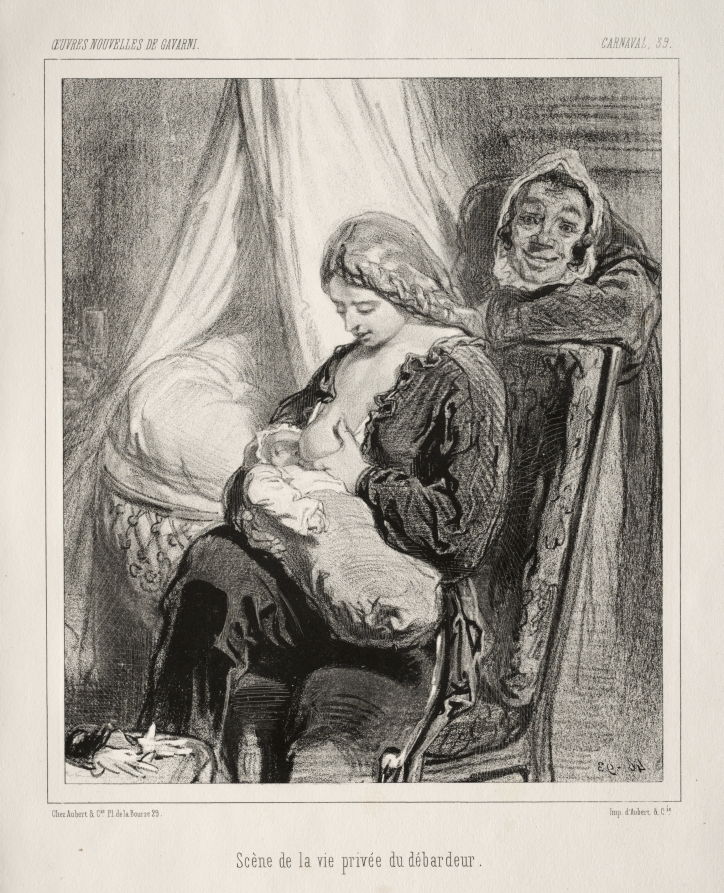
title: Carnaval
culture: France, 19th century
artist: Paul Gavarni (French, 1804–1866)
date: c. 1841–47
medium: lithograph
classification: Print